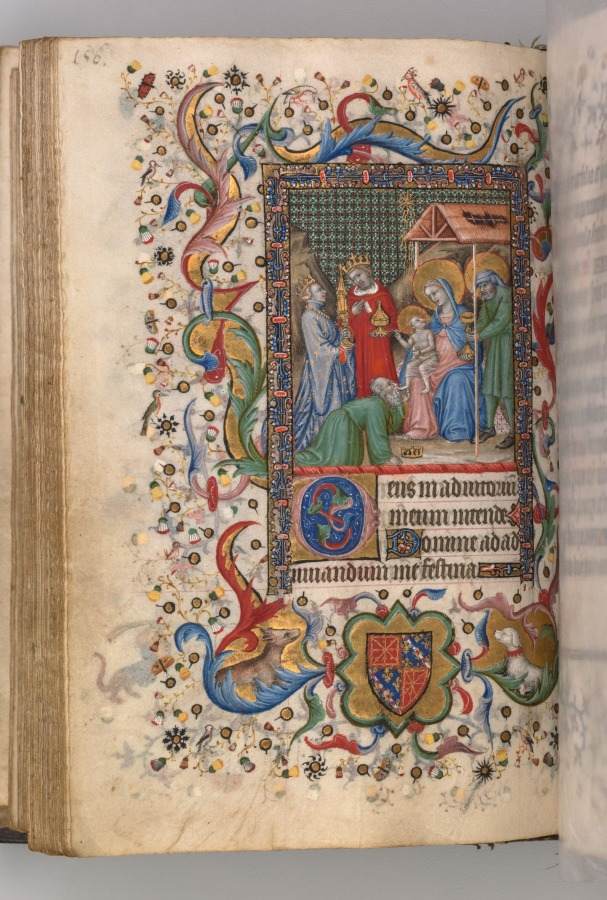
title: Hours of Charles the Noble, King of Navarre (1361-1425): fol. 78v, Adoration of the Magi (Sext)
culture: France, Paris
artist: Master of the Brussels Initials and Associates (French)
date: c. 1405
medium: ink, tempera, and gold on vellum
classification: Bound Volume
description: This precious volume was obviously highly prized by its owner, the French-born King of Navarre, who had his coat of arms painted on no less than twenty folios. Rather than directly commissioning this manuscript from a specific workshop, it seems that Charles the Noble acquired his book of hours -- perhaps ready-made for the luxury market -- while on a trip to Paris in 1404-05. A collaborative effort, six painting styles are evidenced within the pages of this codex, those of two Italians, two Frenchmen, and two Netherlanders. The painter who was responsible for the planning and decoration of the book, and who produced seventeen of the large miniatures, was a Bolognese artist known as the Master of the Brussels Initials. His principal assistant, responsible for most of the borders, was a Florentine who signed his name "Zecho" da Firenze on folio 208 verso.